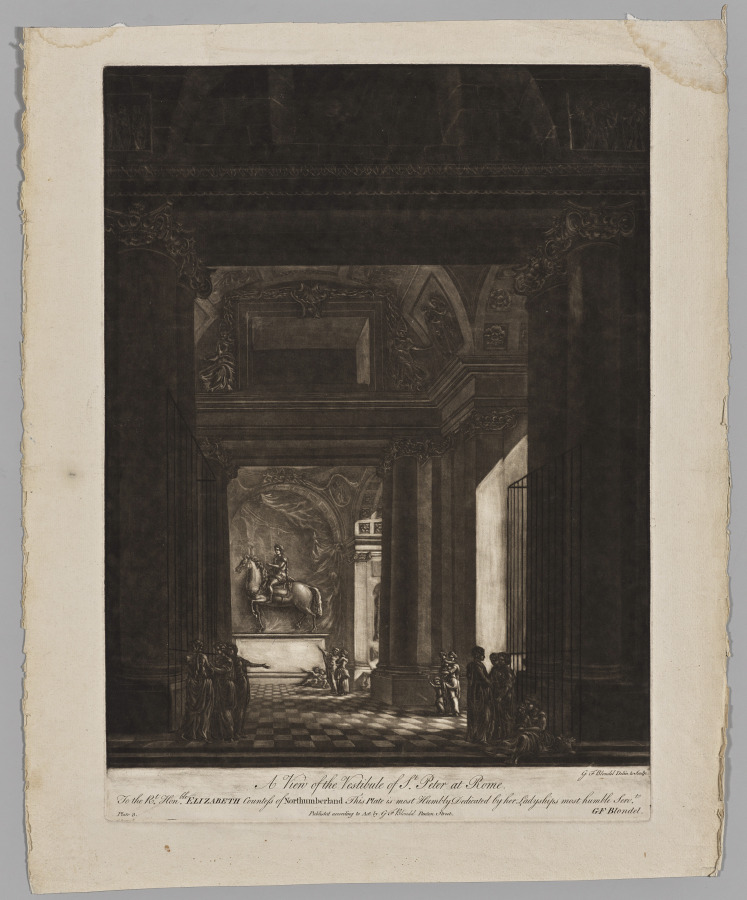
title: A View of the Vestibule of St. Peter at Rome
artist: Georges Francois Blondel (French, 1730–1800)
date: 1766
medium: mezzotint printed in black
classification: Print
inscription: Imprinted on rect: “A View of the Vestibule of St. Peter at Rome”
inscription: Imprinted on recto: “G.F. Blondel Delin & Sculp”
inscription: Imprinted on recto: “To the Rt Honble Elizabeth Countess of Northumberland This Plate is most Humbly Dedicated by her Ladyships most humble Srv’t/Published according to Act by G.F. Blondel Panton Street/GF Blondel/Plate 3”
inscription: Watermark: Grand-Jésus stock of T. Dupuy, watermark Name of Jesus (IHS), countermark T Dupuy Fin Auvergne 1742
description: After returning from several years spent in Italy, the French printmaker George-Francois Blondel settled in London in order to take advantage of the English taste for images of Italian sites. This is one of a series of eight prints he published in 1766 depicting imagined and real Italian interiors. Using the relatively new technique of mezzotint, which creates velvety, dark tonal areas, as well as low vantage points, Blondel created towering, awe-inspiring spaces. For special patrons, he printed the plates in sepia ink, rather than in black; the CMA’s set includes two of these unusual sepia impressions.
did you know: Mezzotint was relatively new at the time this print was made and had yet to be utilized for such large plates of an architectural nature as seen here.